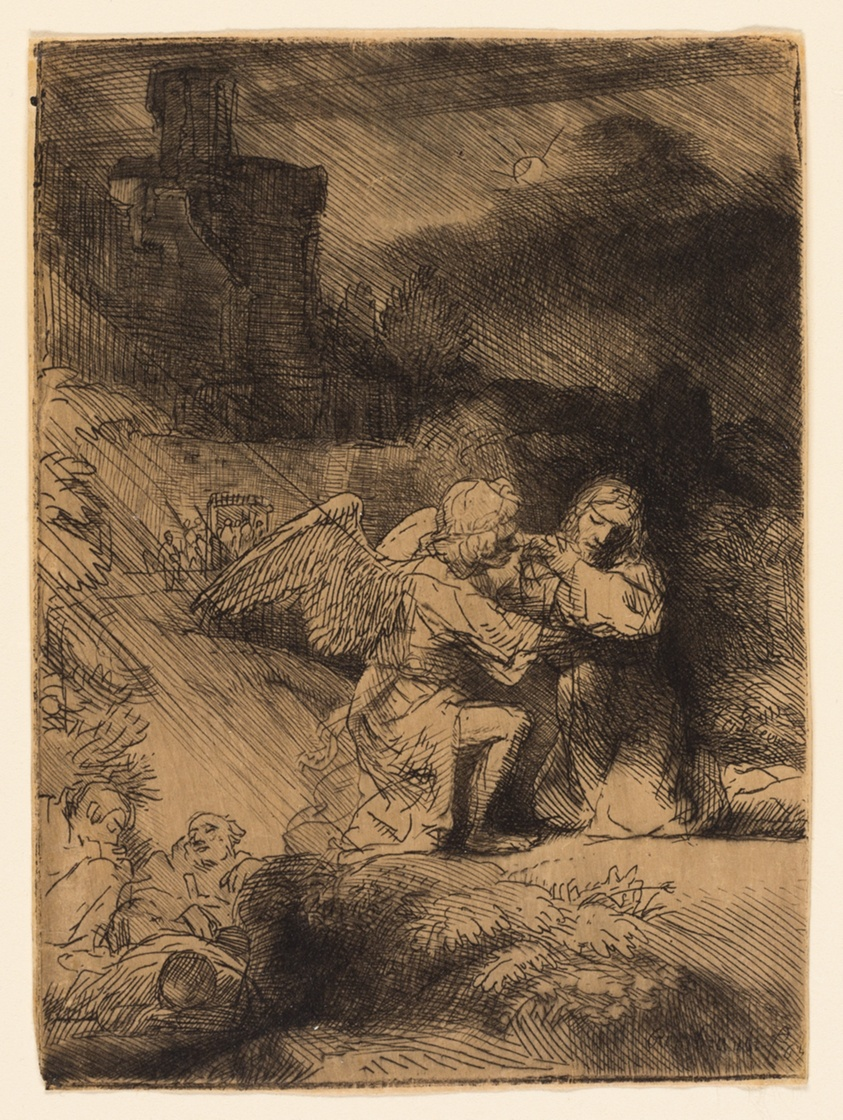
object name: Print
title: The Agony in the Garden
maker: Rembrandt van Rijn (Dutch, 1606-1669)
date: c. 1652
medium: Etching and drypoint on cream Japanese paper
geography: Holland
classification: etching; print; prints and drawing; paper; drypoint